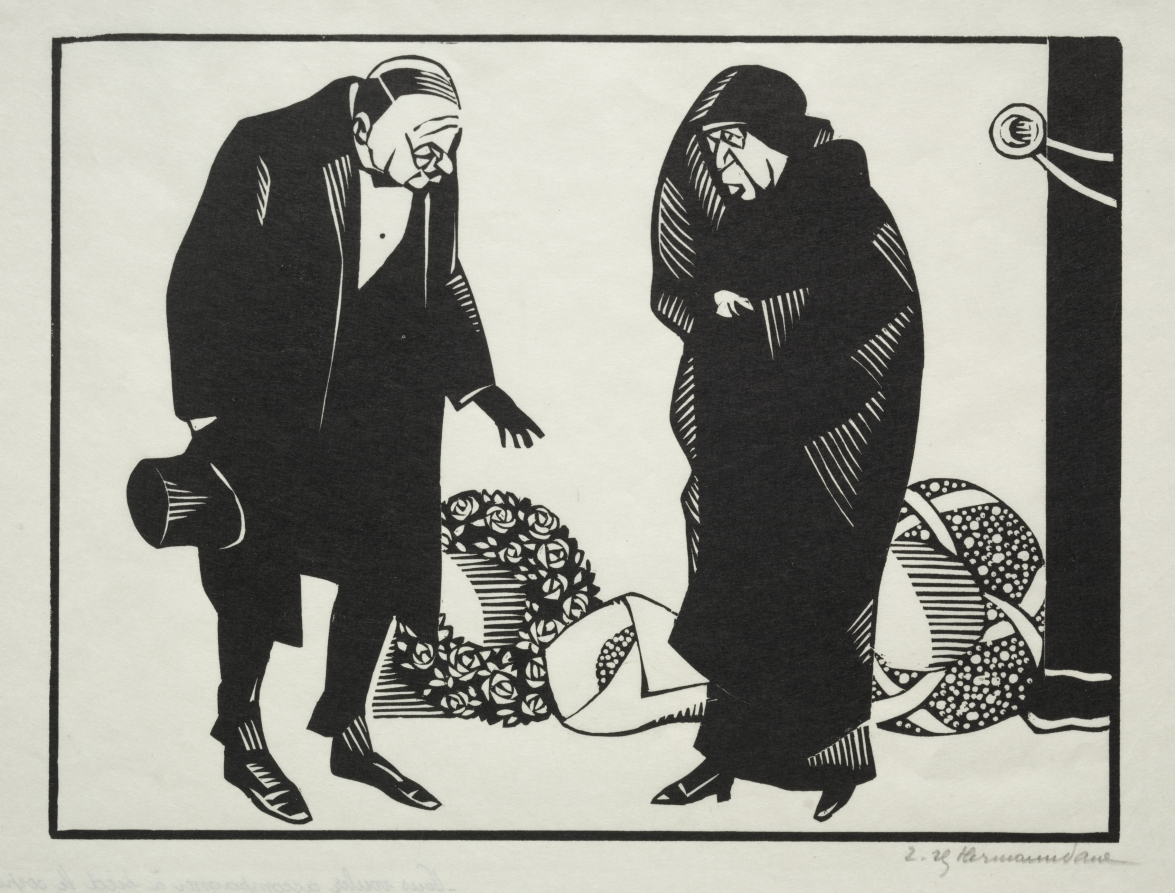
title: Vous voulez accompagner à pied le corps de votre - Oui c'est une occasion de marche un peu.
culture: France, 20th century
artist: Hermann Paul (French, 1864–1940)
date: c. 1920s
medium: woodcut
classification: Print